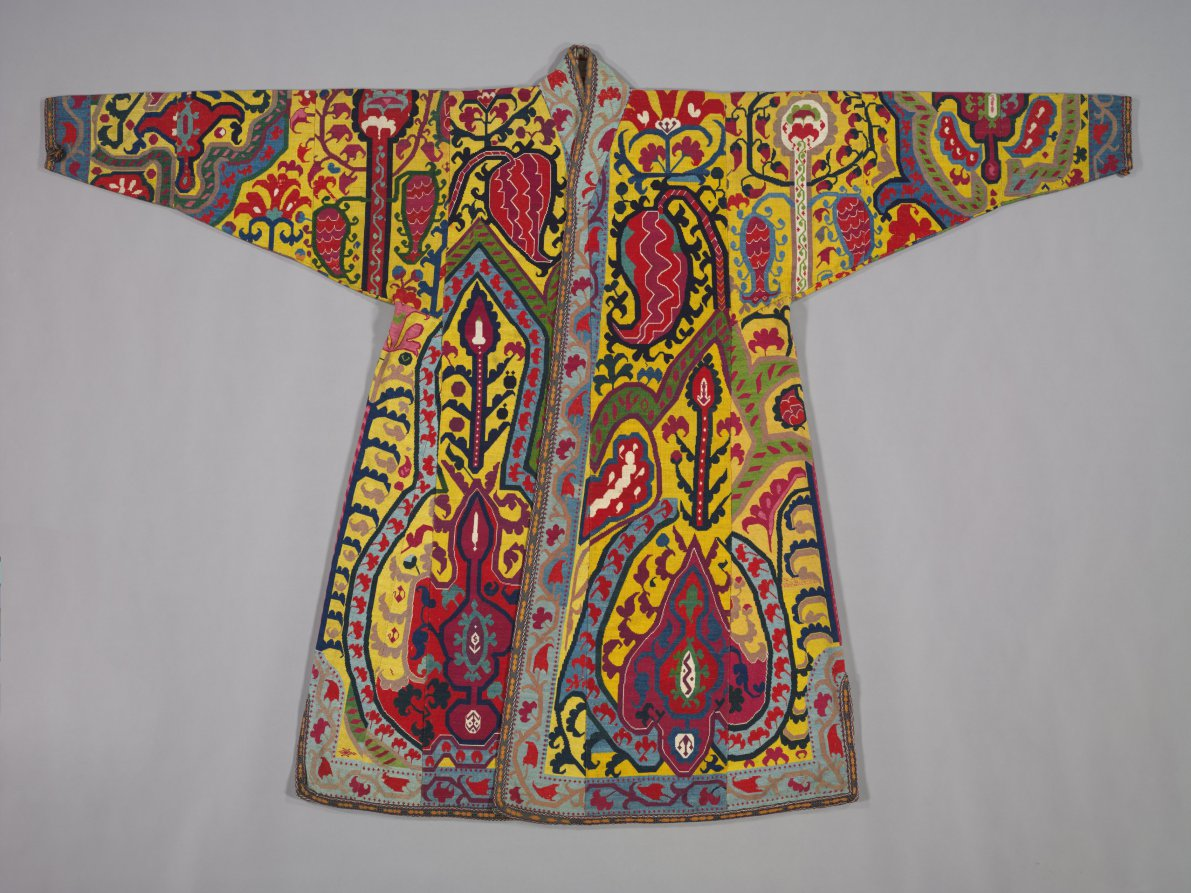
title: Man's surcoat (khalat)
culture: Uzbekistan, Shahr-i Sabz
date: late 1800s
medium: Silk: embroidery, cross-stitch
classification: Garment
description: Prestigious men’s surcoats embellished with designs such as this dramatic decoration in cross-stitch were among the most elaborate silk-thread embroidered garments in Central Asia. In a flamboyant style, large palmettes framed by split palmette leaves dominate with quartered rosettes and smaller flora on a brilliant yellow ground. Foliate vines enhance the edge along the front center opening, hemline, and cuffs. It is lined with an ikat of cypress trees and finger-looped trim. The style and technique represent professional work from Shahr-i Sabz, south of Samarkand. The pattern was drawn on the cotton ground cloth of the surcoat, then disassembled for stitching, and finally reassembled—revealed by severed and misaligned motifs plus mismatched colors.